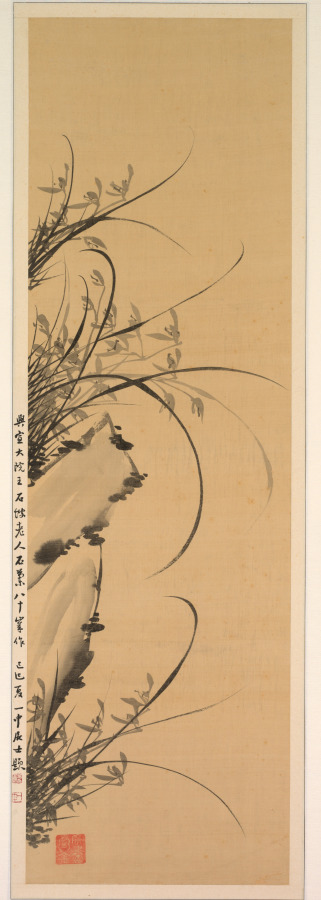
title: Orchids and Rocks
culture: Korea, Joseon dynasty (1392–1910)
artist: Yi Ha-eung (Korean, 1820–1898)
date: 1897–98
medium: Eight-panel folding screen; ink on silk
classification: Painting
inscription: Translation: [I] painted for the high minister Yangwon. [I] humbly request your corrections and advice [on my painting]. [By] an eighty-year old gentleman of rocks.)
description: Yi Ha-eung (1820−1898), the artist of this eight-panel folding screen, was one of the most influential men in late 19th-century Korea. Acting as the regent for his son, King Gojong (1852−1919), who ascended the throne at the age of thirteen, Yi ruled Korea from 1866 to 1873. In addition to his illustrious political career, Yi was also recognized as one of the most celebrated artists who led the revival of literati art in late 19th-century Korean art. In particular, he was recognized as the master of orchids, one of the “Four Gentlemen” (plum, orchid, chrysanthemum, and bamboo) themes. Solely relying on monochrome ink, Yi depicted the curvilinear silhouettes of cymbidium orchid leaves dramatically hanging down from cliffs. Growing in wilderness and redolent with fragrance, orchids were often associated with the perseverance of principled gentlemen, and thus became one of the most popular subjects of scholar-artists' paintings.On the upper right corner of the far left panel, Yi wrote a short inscription stating that he painted the work at the age of 80.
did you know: The artist of this elegant painting is the formidable politician Yi Ha-eung (1820–1898), who is known for a seclusion policy that aimed to protect Korea and its sovereignty from foreign influences.